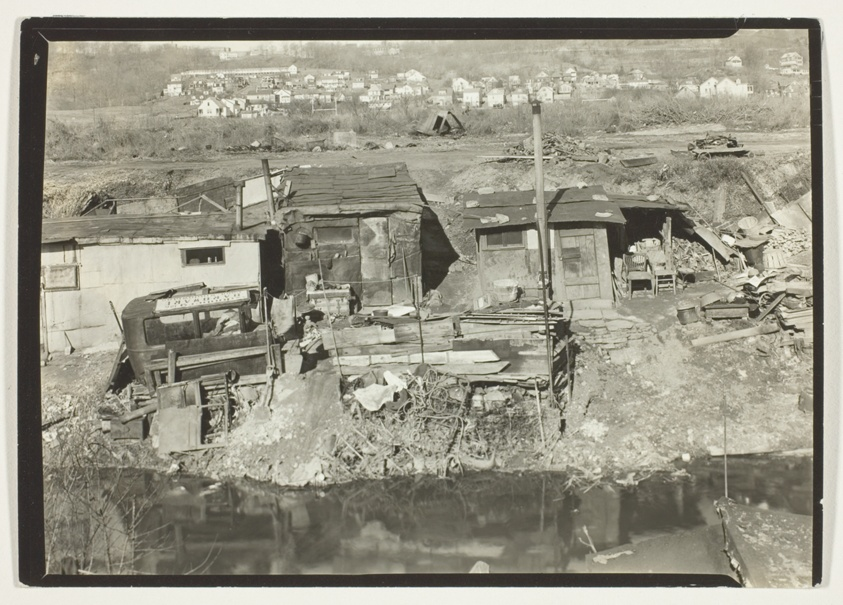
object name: Photograph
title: Living Quarter Of "Out-Of-Works" In Patterson, New Jersey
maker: Lewis Wickes Hine (American, 1874–1940)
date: c. 1935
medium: Gelatin silver print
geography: United States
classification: gelatin silver (developing-out-paper) pr; photographic process; photography; photograph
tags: Collected by Hugh Edwards